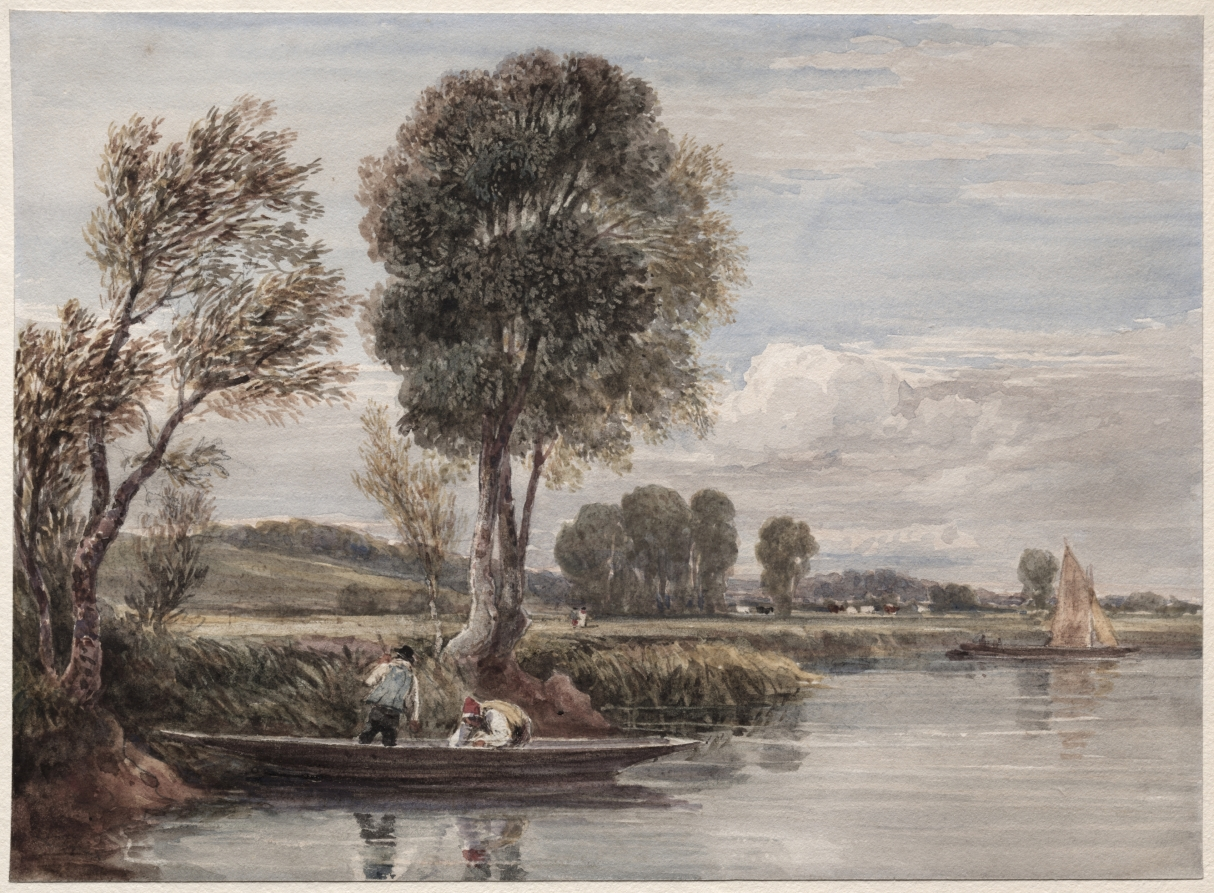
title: On the Thames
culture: England, 19th century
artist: David Cox (British, 1783–1859)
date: c. 1827–29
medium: watercolor with graphite and scraping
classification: Drawing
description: One of the great champions of watercolor painting during the first half of the 19th century, David Cox is most celebrated for his atmospheric landscapes that convey a sense of movement and light as affected by nature. Here, translucent streaks of blue and gray in the sky suggest movement among the clouds, and small dashes of color throughout the foreground trees create a sense of rustling vegetation. Reflections on the river’s surface shimmer with light.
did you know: David Cox began his career as a painter of theatrical scenery in his native Birmingham.